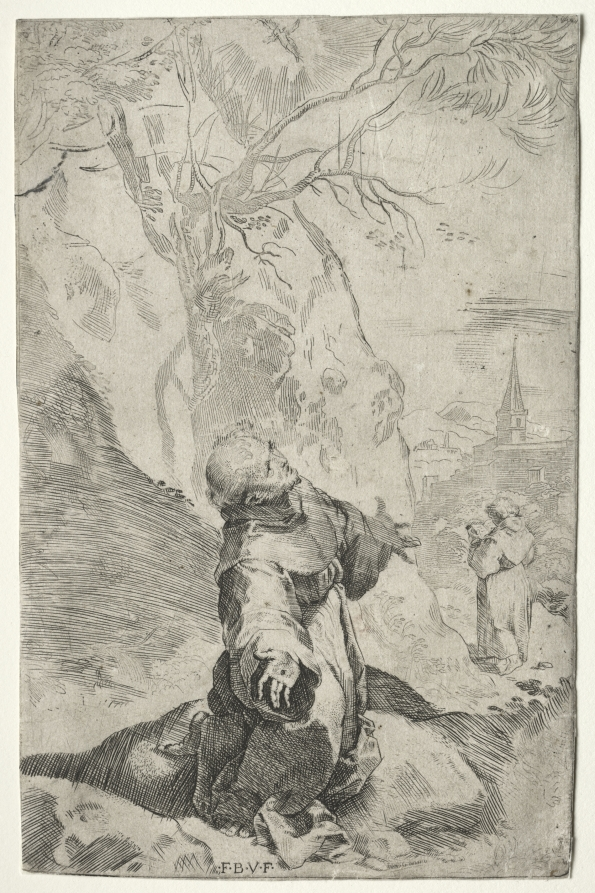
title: St. Francis Receiving the Stigmata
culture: Italy, 16th century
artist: Federico Barocci (Italian, 1528–1612)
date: c. 1581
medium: etching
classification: Print